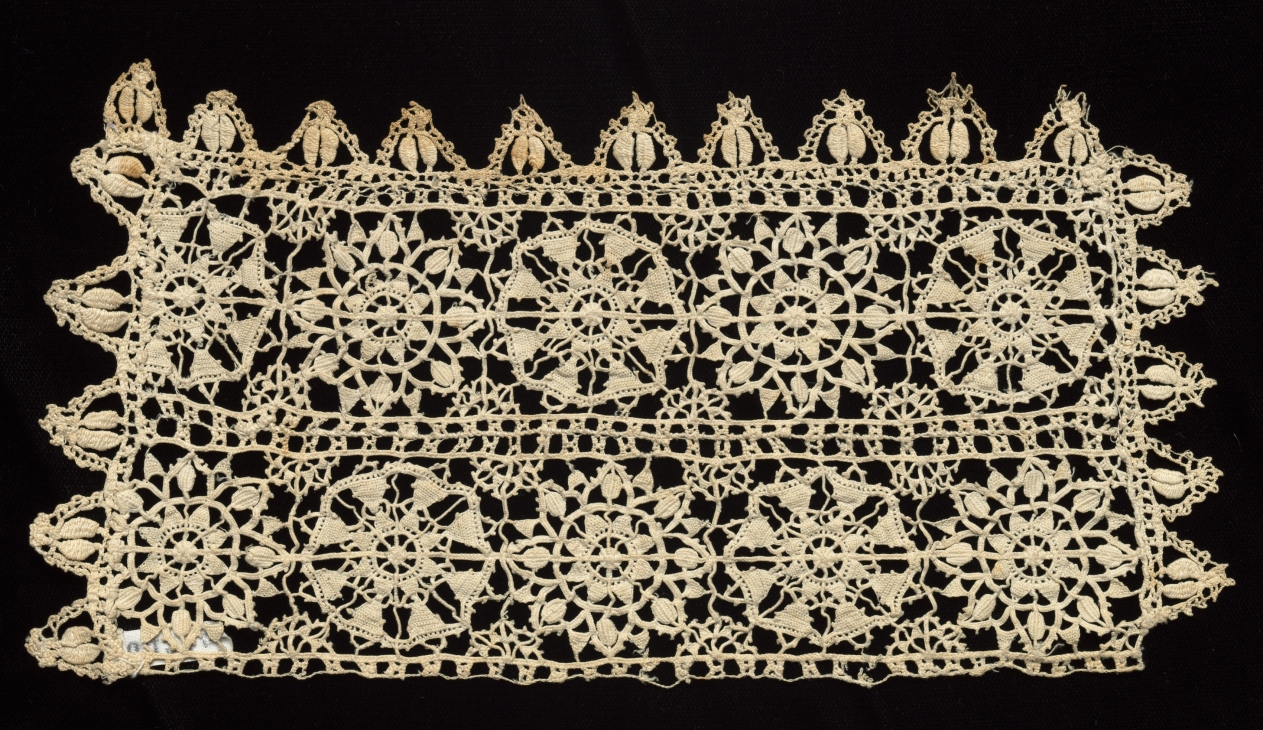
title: Lace Cuff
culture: Italy, Genoa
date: 1560–1600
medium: Linen; needle lace (cutwork and reticella) and bobbin lace edging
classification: Lace